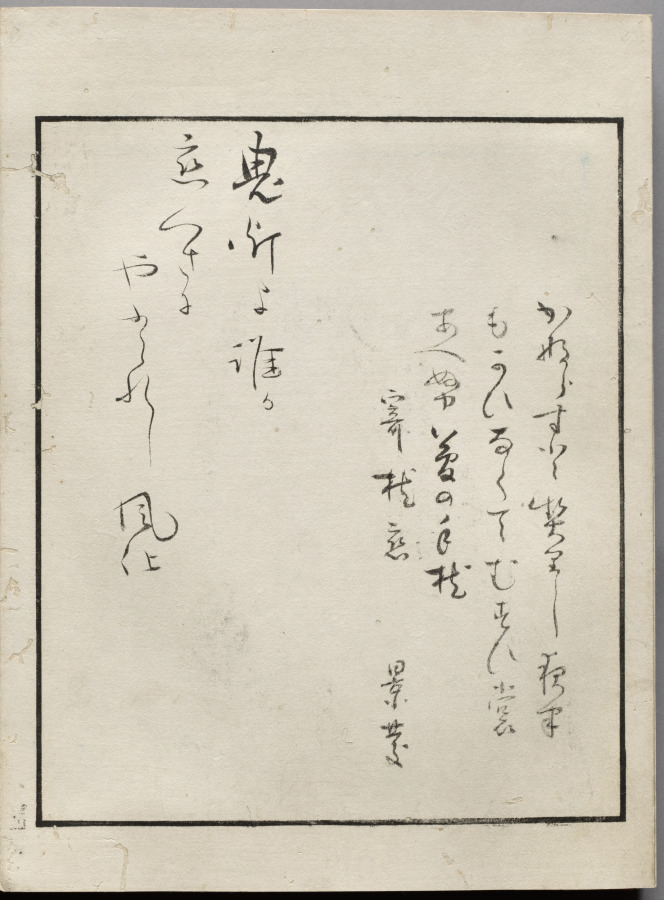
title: Double-Leaf from Album of Actor Portraits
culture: Japan, Edo period (1615–1868)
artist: Shōrakusai (Japanese)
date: c. 1790–1810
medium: double-leaf from an accordion-style album; ink on paper (right), and ink and color on silk (left)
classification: Bound Volume